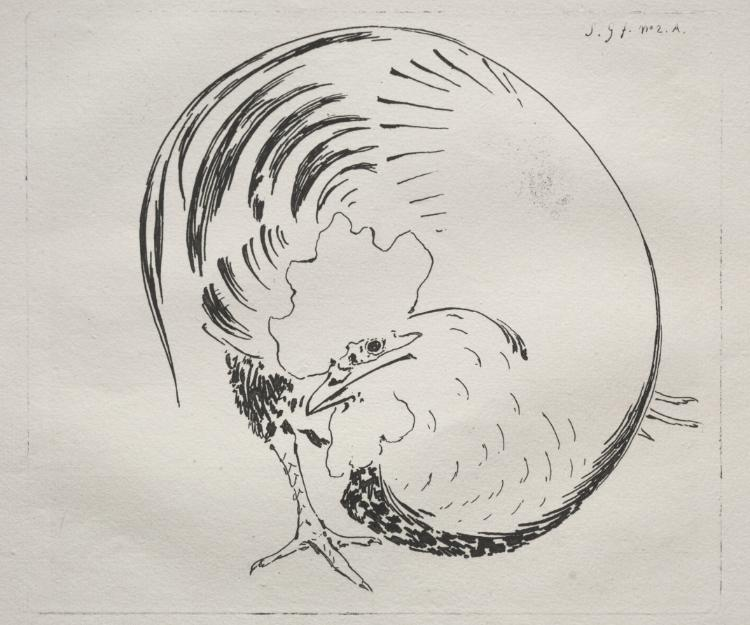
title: The High-Fired Service: Rooster (counterproof)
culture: France, 19th century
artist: Félix Bracquemond (French, 1833–1914)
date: c. 1860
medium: etching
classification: Print